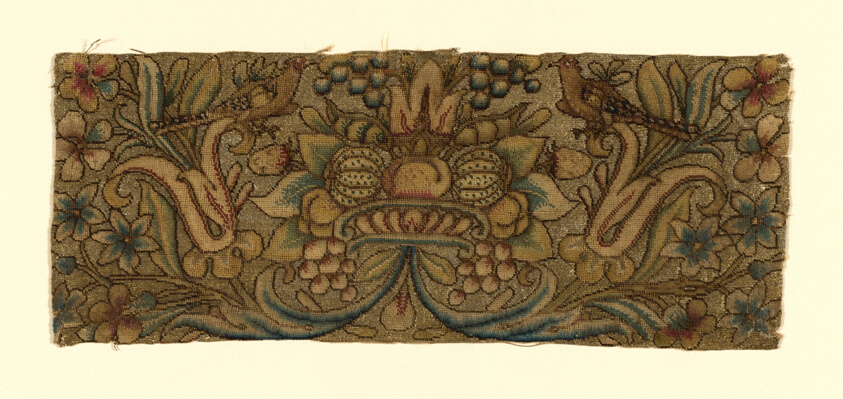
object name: Textile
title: Fragment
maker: France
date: 17th/18th century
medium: Linen, plain weave; embroidered with silk floss and gold metal thread wound around a silk fiber core in tent stitch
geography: France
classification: textile; needlework (visual works)